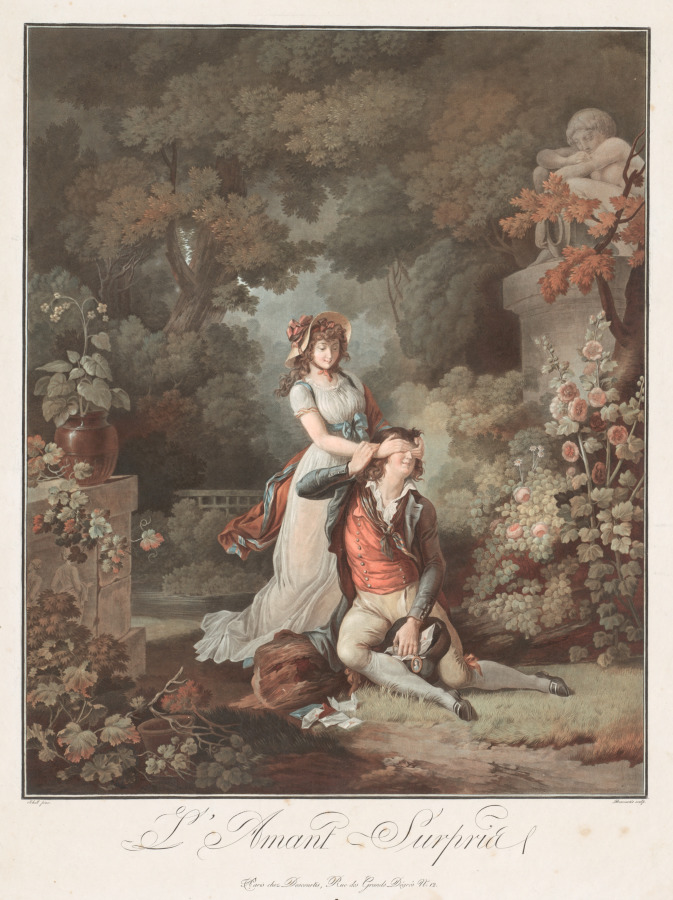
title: The Lover Surprised (L'Amant Surpris)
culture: France, 18th century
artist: Charles-Melchior Descourtis (French, 1753–1820)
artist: after Frédéric Schall (French, 1752–1825)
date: c. 1798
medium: Wash manner etching and engraving printed in blue, red, yellow, and black inks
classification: Print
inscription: In plate, below image: Schall pinx. Descourtis sculp. A Paris, chez Descourtis, Rue des Grands Degrés No. 12.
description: A young woman surprises her sweetheart, whom she has found reading love letters in a wooded park. The love-struck fellow carries a miniature portrait of her as a keepsake. Verdant foliage, a nearby brook, and a blooming rosebush signal fertility and the bounty of life. The nude female statue sitting on a pedestal seems to watch the playful lovers.